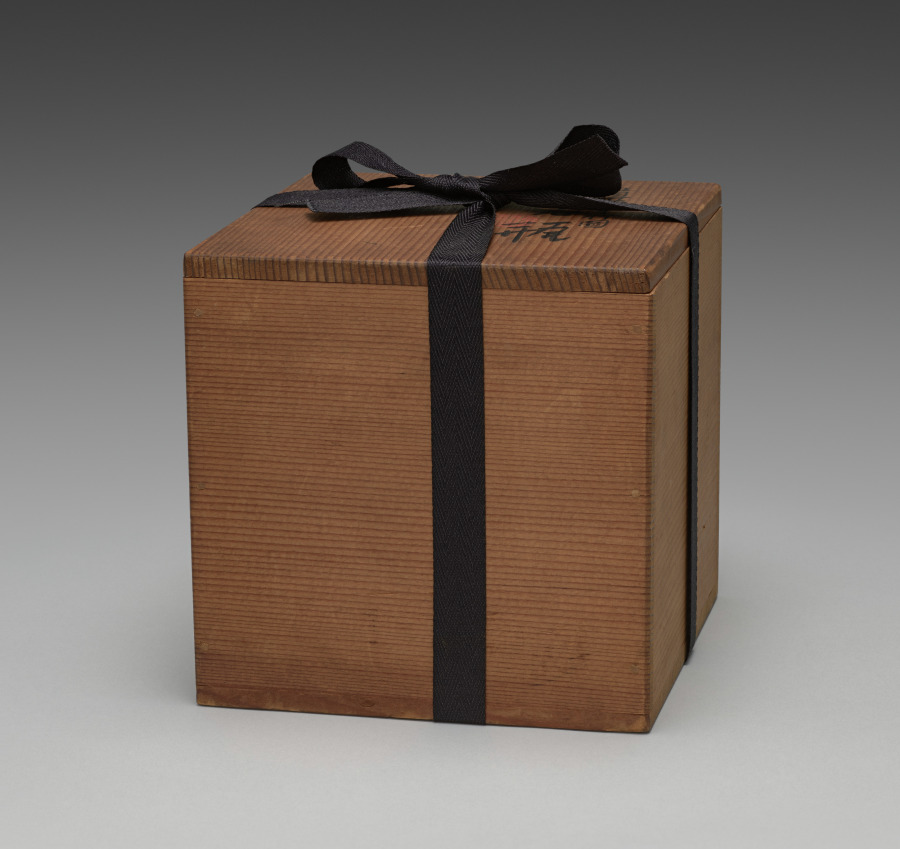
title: Teapot with Bamboo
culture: Japan, Taishō period (1912–26) or Shōwa period (1926–89)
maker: Seifū Yohei IV (Japanese, 1872–1951)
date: 1914–46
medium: Porcelain with underglaze blue, molded design and metal handles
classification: Ceramic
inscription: 清風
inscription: 清風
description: This teapot has a well-balanced design of bamboo in underglaze blue and nyoi staff-head motifs applied to both sides at the shoulder.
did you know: There is a seal on the base of the teapot.